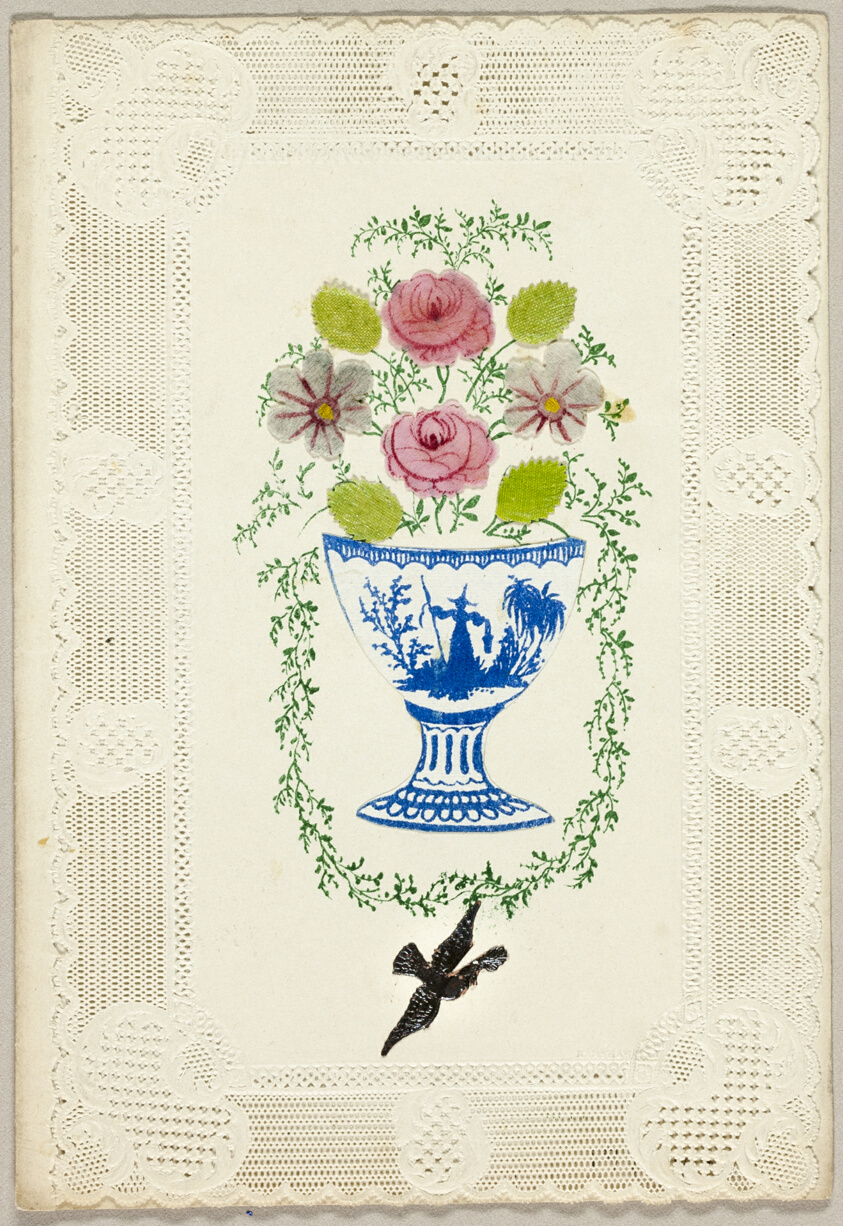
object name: Drawing and Watercolor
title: Untitled Valentine (Vase of Flowers with Bird)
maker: George Kershaw (English, 19th century)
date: c. 1840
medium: Watercolor and collaged elements on cut and embossed ivory wove paper (lace)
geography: England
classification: valentine; prints and drawing; paper